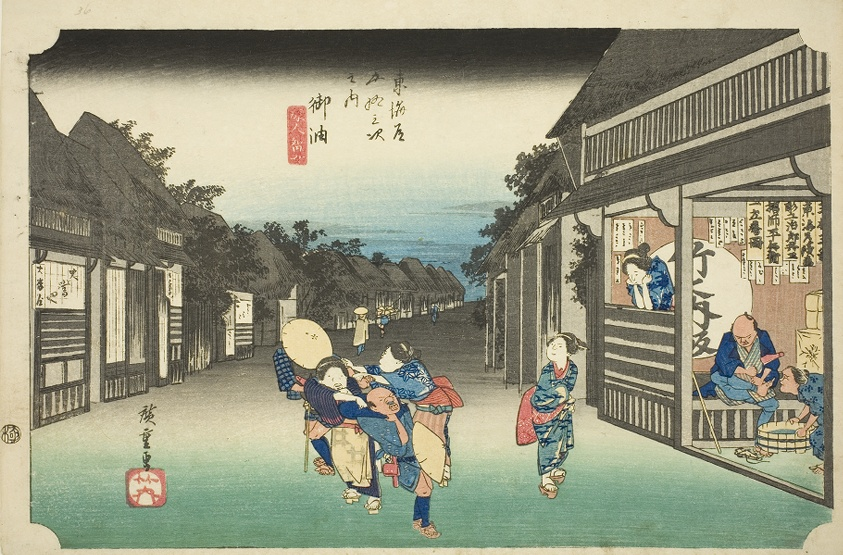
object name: Print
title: Goyu: Women Stopping Travelers (Goyu, tabibito tomeru onna), from the series "Fifty-three Stations of the Tokaido (Tokaido gojusan tsugi no uchi)," also known as the Hoeido Tokaido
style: Japanese (culture or style)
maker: Utagawa Hiroshige 歌川 広重; Japanese, 1797-1858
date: c. 1833/34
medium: Color woodblock print; oban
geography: Japan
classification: woodblock print; print; asian art